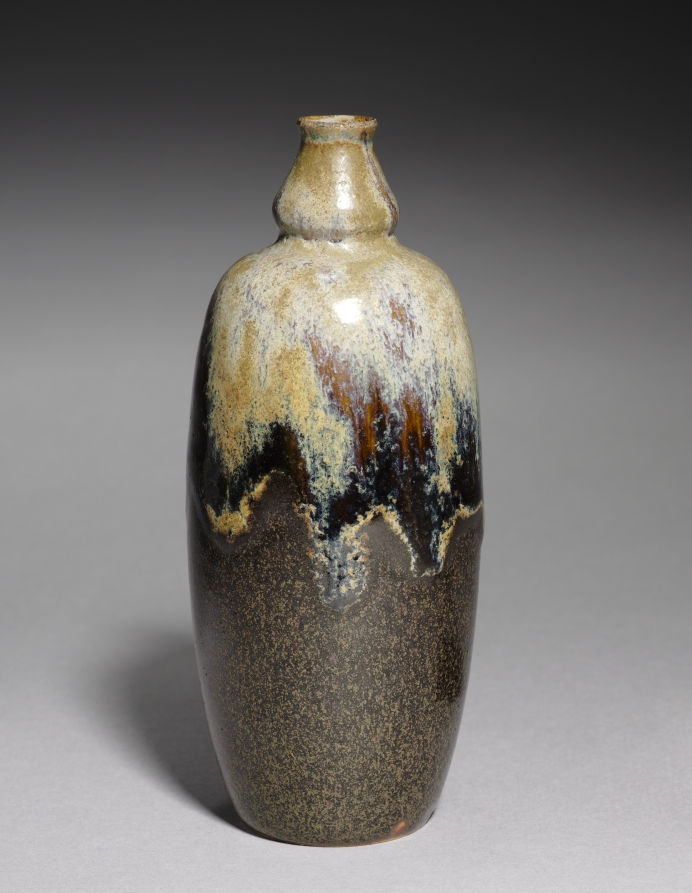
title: Vase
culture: France, early 20th Century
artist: Auguste Delaherche (French, 1857–1940)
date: c. 1910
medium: stoneware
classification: Ceramic